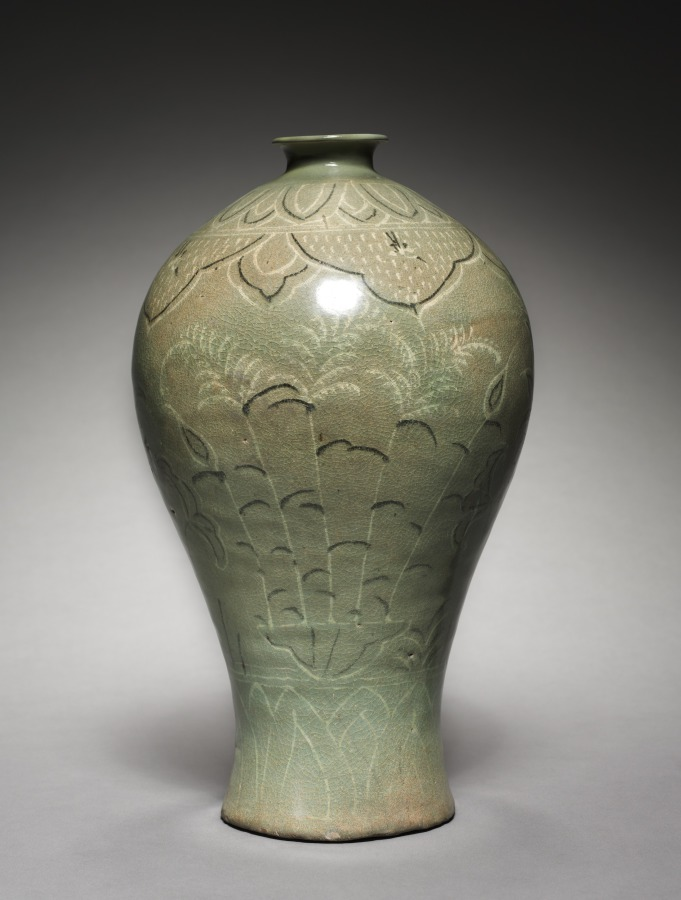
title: Prunus Vase with Inlaid Lotus and Reed Design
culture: Korea, Goryeo dynasty (918–1392)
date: 1300s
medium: Celadon ware with inlaid white and black slip decoration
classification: Ceramic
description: As early as the seventh century, the practice of drinking tea and wine became an important part of elite culture in Korea. Once used to store alcoholic beverages, this type of vase features a wide body followed by a sharply rounded shoulder, a short neck and a small opening. Most of the remaining examples no longer have a lid, but originally it may have had a lid that not only covers the opening, but also served as a cup.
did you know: Prunus vases are often believed to contain a branch of plum blossoms, but recent research reveals that these lidded vases were also used to contain cooking liquid such as sesame oil.